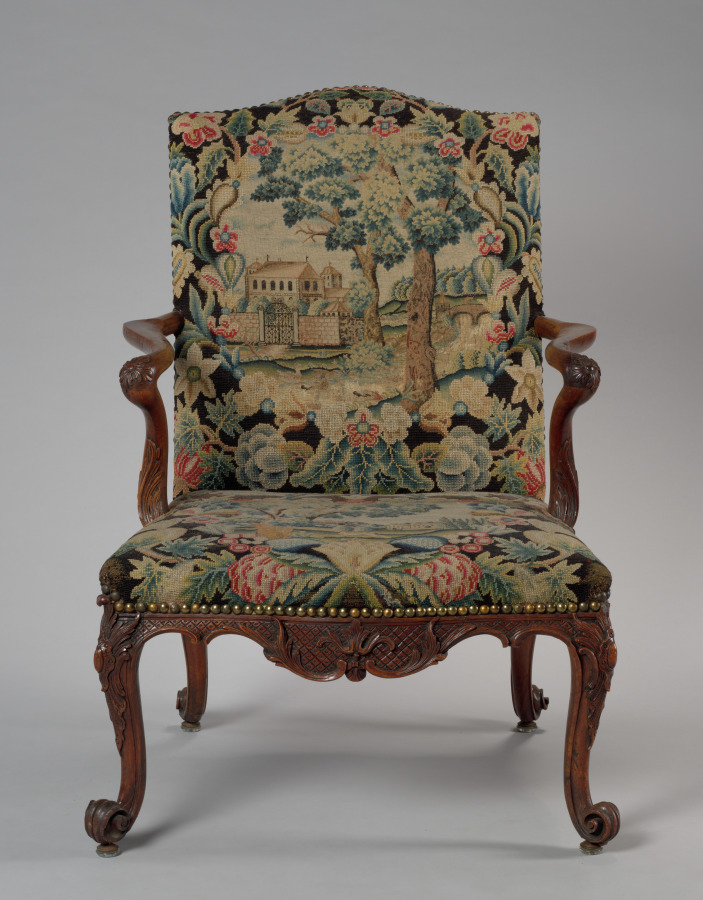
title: Armchair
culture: England, 18th century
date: 1760–1765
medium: mahogany upholstered in needlework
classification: Furniture and woodwork